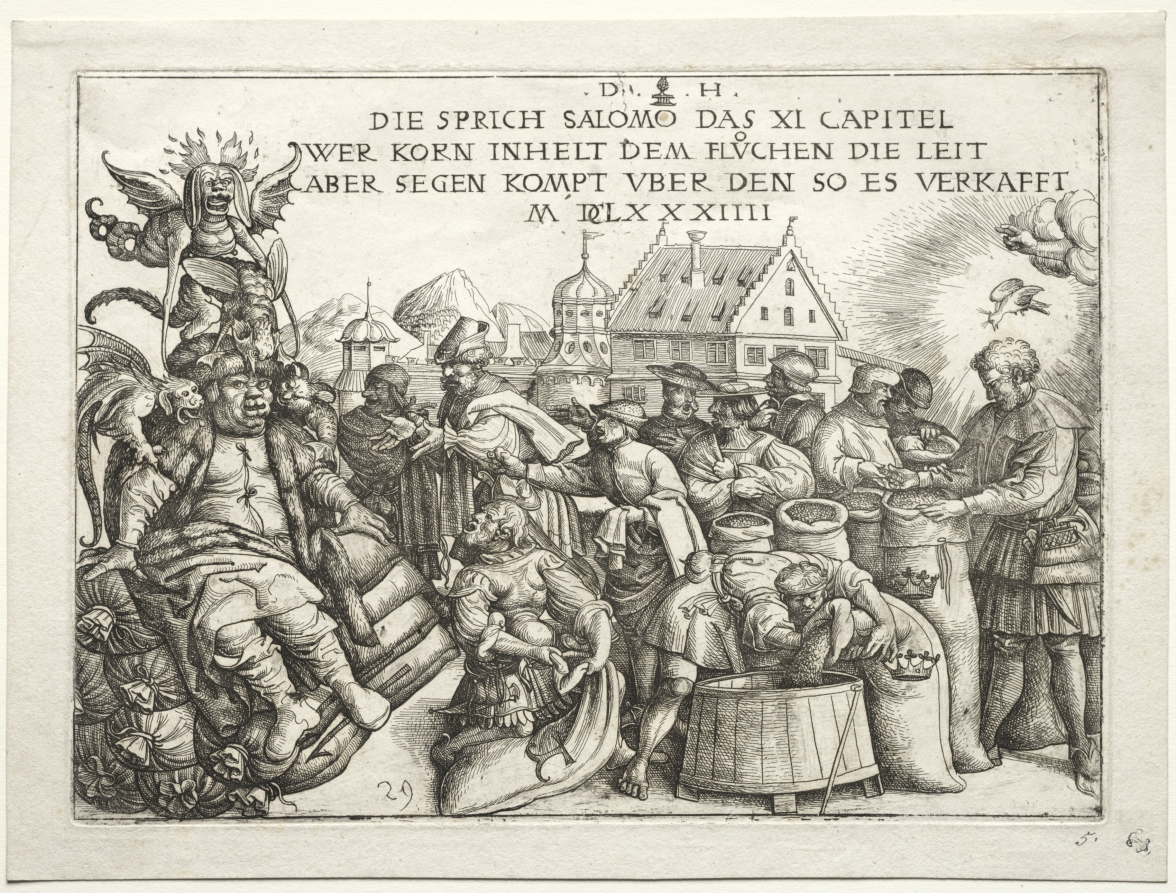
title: Illustration to proverbs XI (The Hoarders of Grain)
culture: Germany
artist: Daniel Hopfer (German, c. 1470–1536)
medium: etching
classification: Print